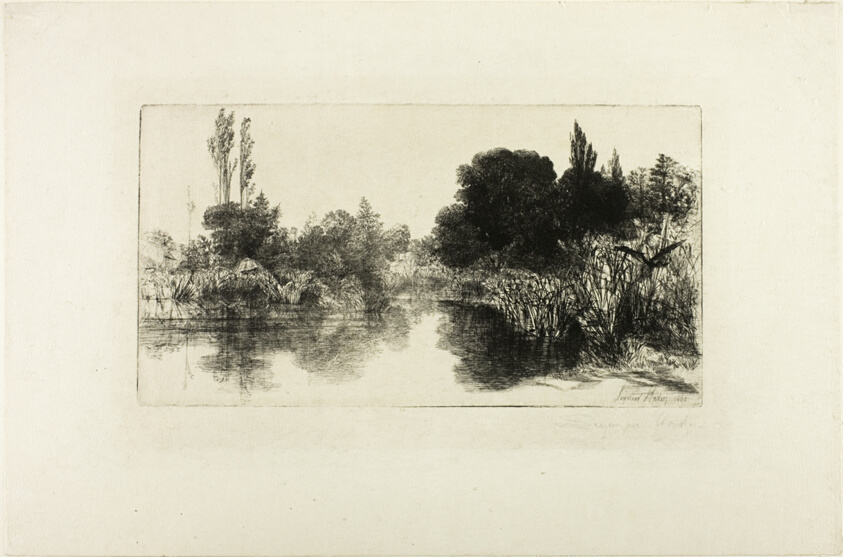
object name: Print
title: Shere Mill Pond, No. II (large plate)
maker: Francis Seymour Haden (English, 1818-1910)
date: 1860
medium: Etching with drypoint on ivory Japanese paper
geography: England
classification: etching; print; prints and drawing